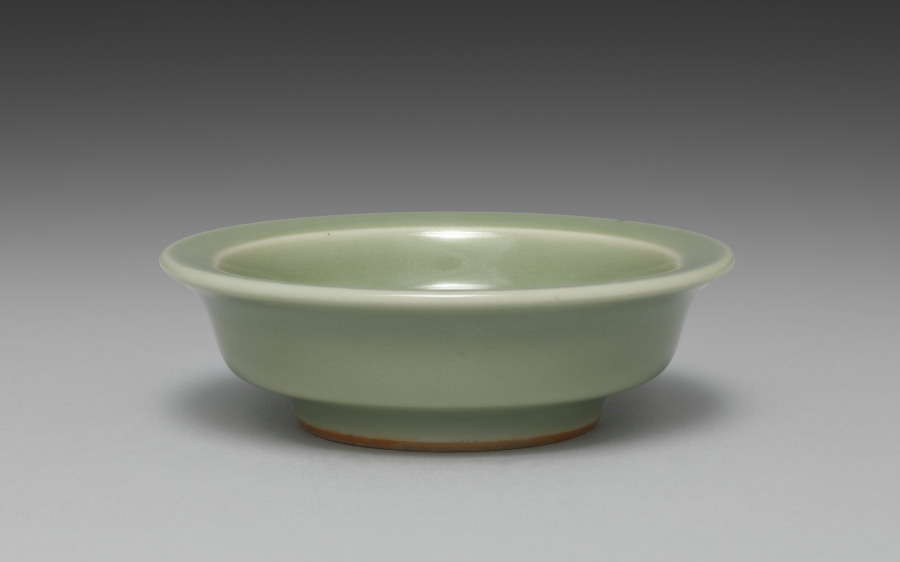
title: Saucer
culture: Japan, Meiji period (1868–1912)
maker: Seifū Yohei III (Japanese, 1851–1914)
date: 1893–1914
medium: One from a set of ten dishes; porcelain with green glaze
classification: Ceramic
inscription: 清風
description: Yohei III’s main output for his sophisticated clientele was in the form of tea sets and dining sets. He created a range of dishes in green glazes. He often produced in pairs, sets of five, or sets of ten. For this set of ten small dishes in a simple, round form that emphasizes the glaze above all, the box lid designates the piece as seiji, or green-glazed porcelain, using a general term for the extensive palette of green glazes often called celadon in English. The box lid further identifies the dishes themselves as tōchō, literally “bean-sized saucers,” a size that makes them suitable for dipping sauces.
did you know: The ten dishes in this set are stored in stacks of five in a two-compartment box.